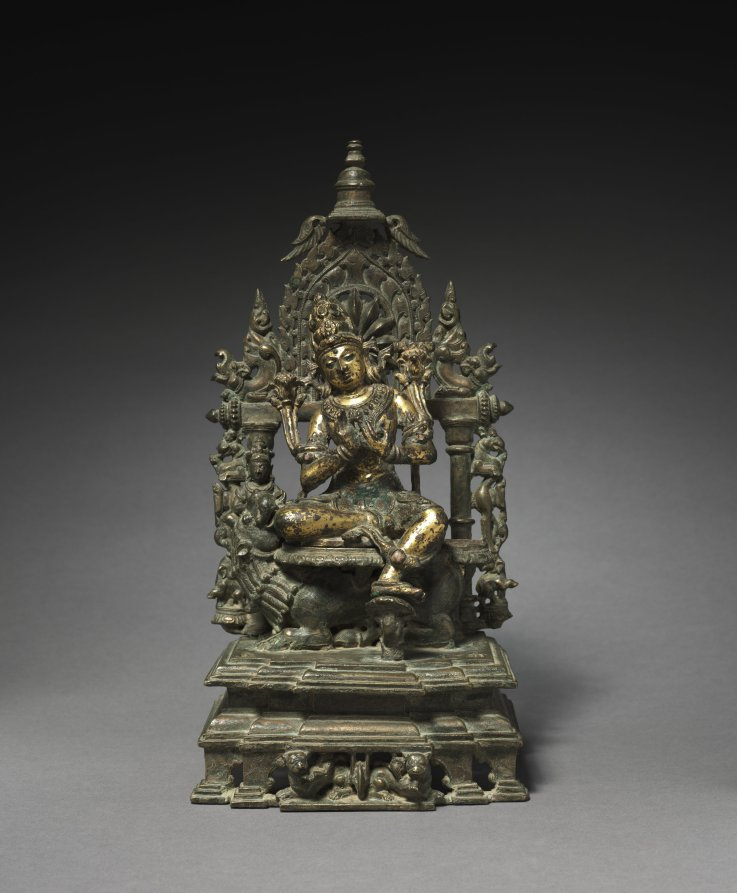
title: Bodhisattva Manjushri: Lord of Wisdom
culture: East India, Bengal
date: 1000s–1100s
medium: Bronze with gilding and inlay of semiprecious stones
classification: Sculpture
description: The Bodhisattva of Wisdom can be identified by the lion mount, the horizontal palm-leaf manuscript on the lotus above his left shoulder, and the stupa above his head. His seat and footrests are lotus flowers, indicating transcendence of the ordinary world.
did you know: His hand gestures show that he teaches the wisdom that leads to enlightenment.